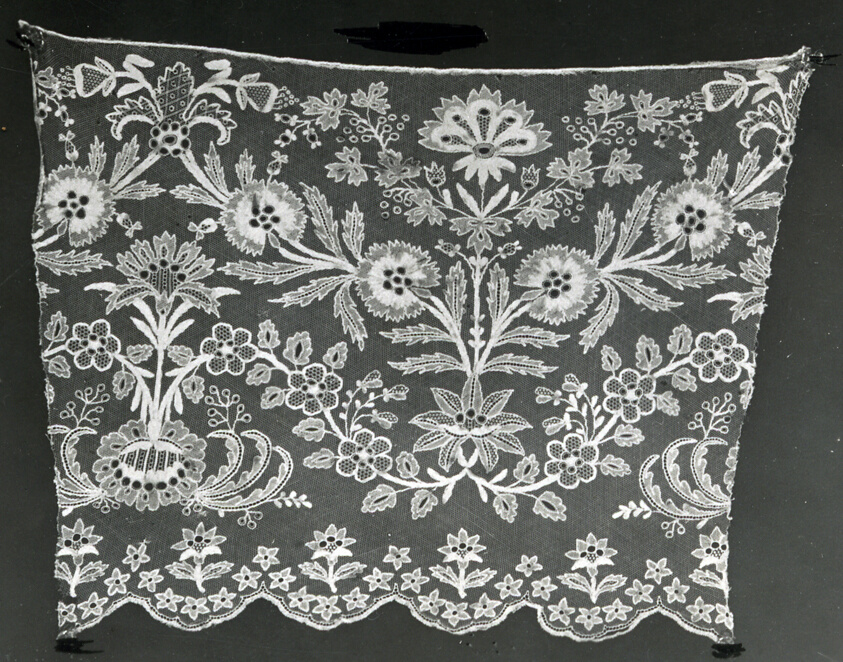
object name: Textile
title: Two Portions from a Flounce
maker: Southern Europe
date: 1850/1900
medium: Cotton, machine-made net; embroidered in cross, darning, wave filling, and a variety of buttonhole stitches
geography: Southern Europe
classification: textile; lace - mixed